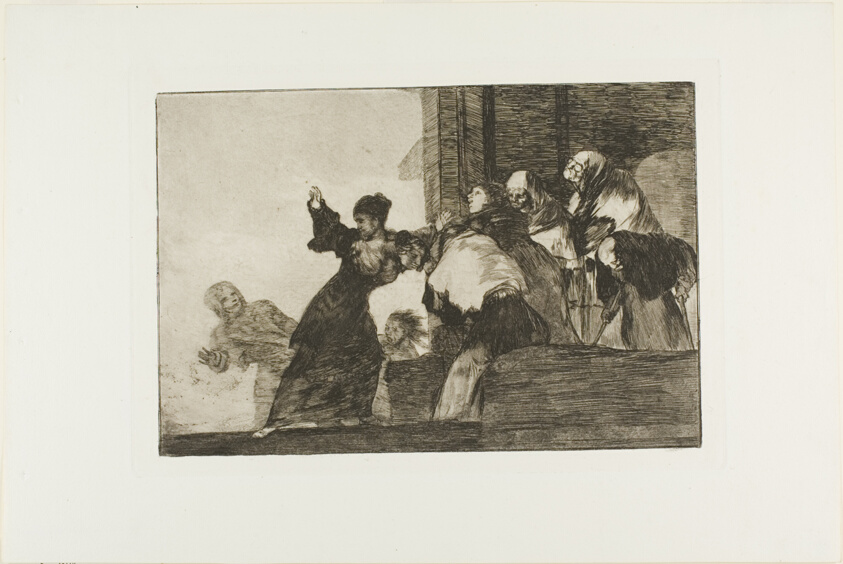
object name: Print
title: Poor Folly, plate eleven from Los Proverbios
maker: Francisco José de Goya y Lucientes (Spanish, 1746-1828)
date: 1815/24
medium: Etching, burnished aquatint, drypoint and burin on ivory wove paper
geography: Spain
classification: etching; print; prints and drawing